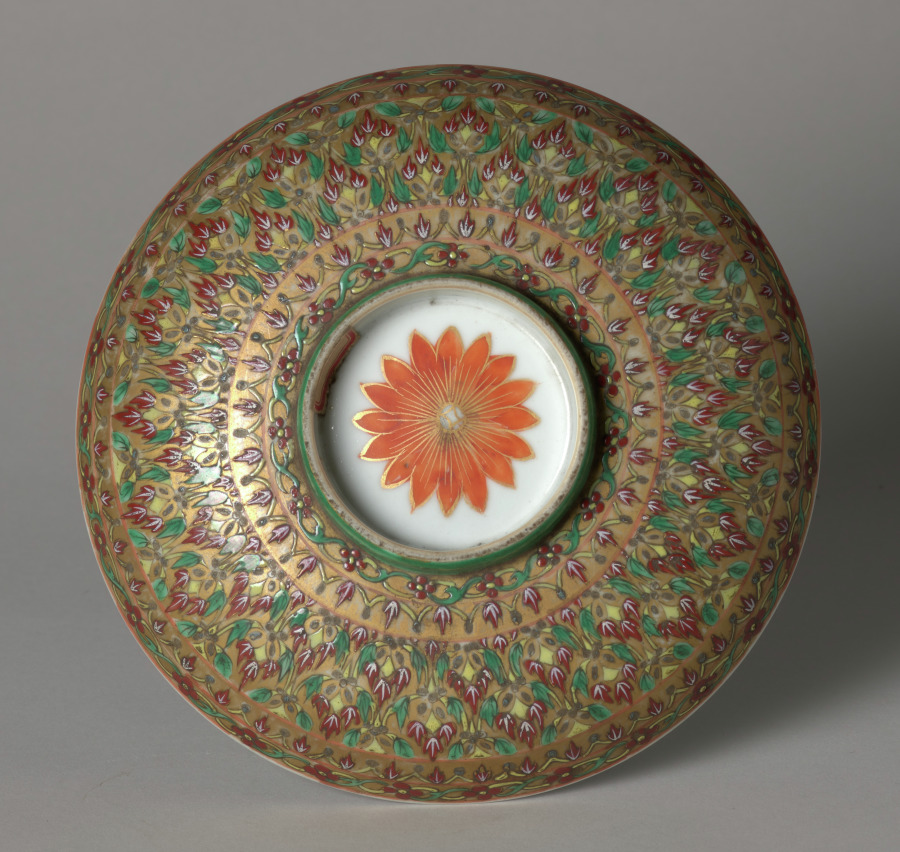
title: Chow Bowl (lid)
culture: Siam, 18th century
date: 1700s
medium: porcelain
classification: Metalwork